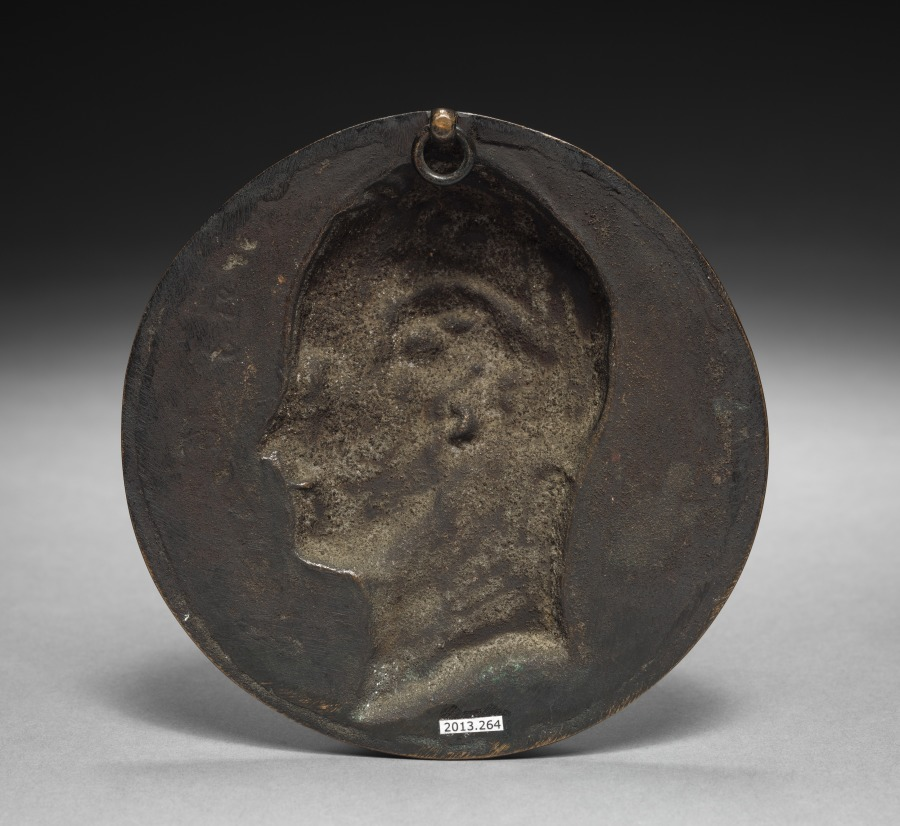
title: Chateaubriand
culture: France, 19th century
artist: Pierre-Jean David d'Angers (French, 1788–1856)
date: 1820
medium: bronze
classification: Sculpture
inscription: inscribed on the left with marks made in the model: "CHATEAUBRIAND." Also marked in the mold under the neck: "DAVID / 1820." There is an illegible mark on the reverse.